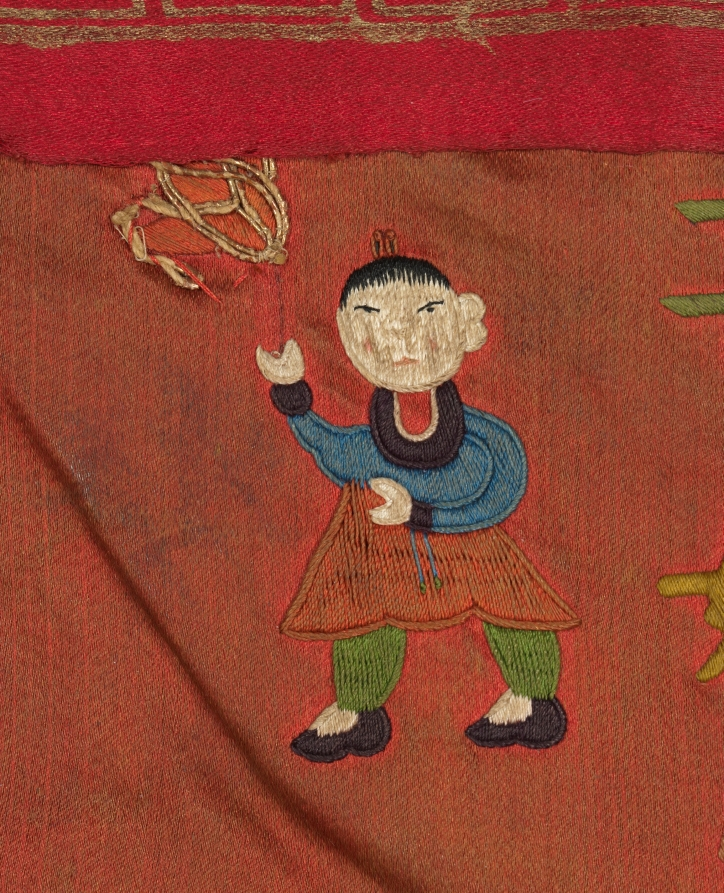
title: Bridal Robe (Hwarot)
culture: Korea, Joseon dynasty (1392–1910)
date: late 1800s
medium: Silk: satin weave; embroidery; paper edging on neck and sleeves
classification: Garment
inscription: 壽如河海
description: This bride's robe is exquisitely embroidered with various symbols of happiness in colorful silk threads. Butterflies stand for marital happiness; the phoenix, numerous offspring; and lotus flowers and white cranes, longevity. Yet, the bridal robe does not attest to the life of luxury. To the contrary, many traces of repairs, trimmings, and patchwork, reflect Joseon period women’s commitment to value neo-Confucian aesthetics of frugality and modesty. Substantial repairs and patching reveal that this robe served as an important communal resource to be shared and passed down through several generations. Its collar and sleeves are covered in thick white paper; this paper is replaced with new paper for each bride, while the robe itself was reused for decades.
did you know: This bride's robe is made of densely embroidered silk, but its collar and sleeves are covered in thick paper.